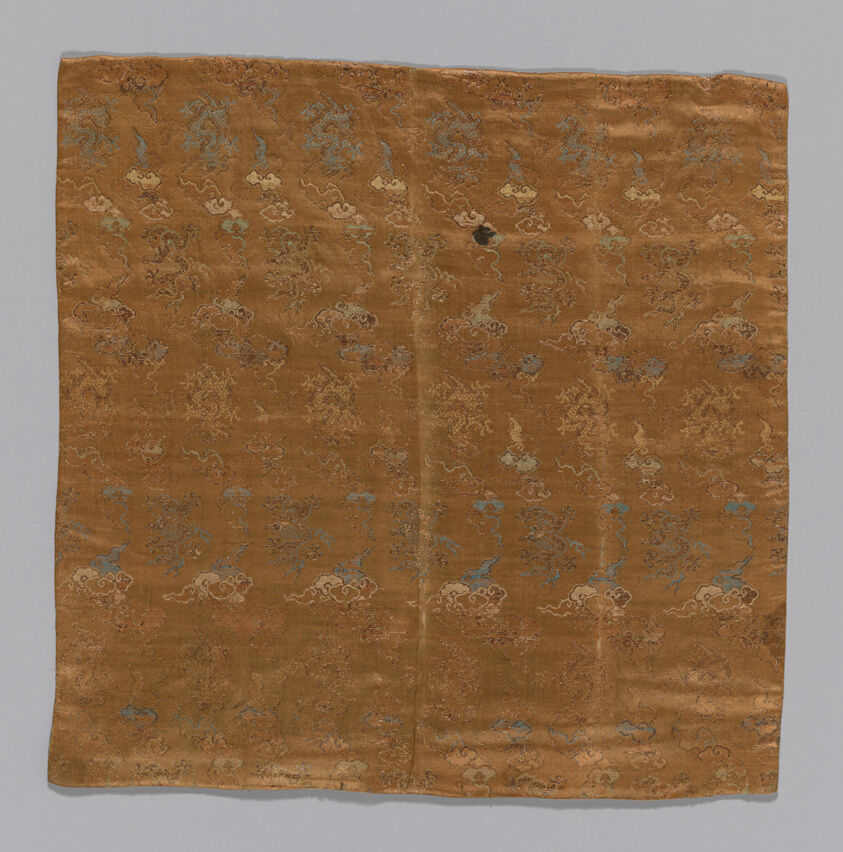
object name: Religious/Ritual Object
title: Uchishiki (Altar Cloth)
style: Japanism, late edo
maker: Japan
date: late Edo period (1789–1868), 1797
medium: Silk and gold-leaf-over-lacquered-paper, warp-float faced 4:1 satin weave with weft-float faced 1:2 ‘z’ twill interlacings of secondary binding warps and supplementary patterning wefts Lining: Bast fiber, plain weave; inscribed with India ink (sumi)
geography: Japan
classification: textile; liturgical - buddhist; weaving; ritual objects